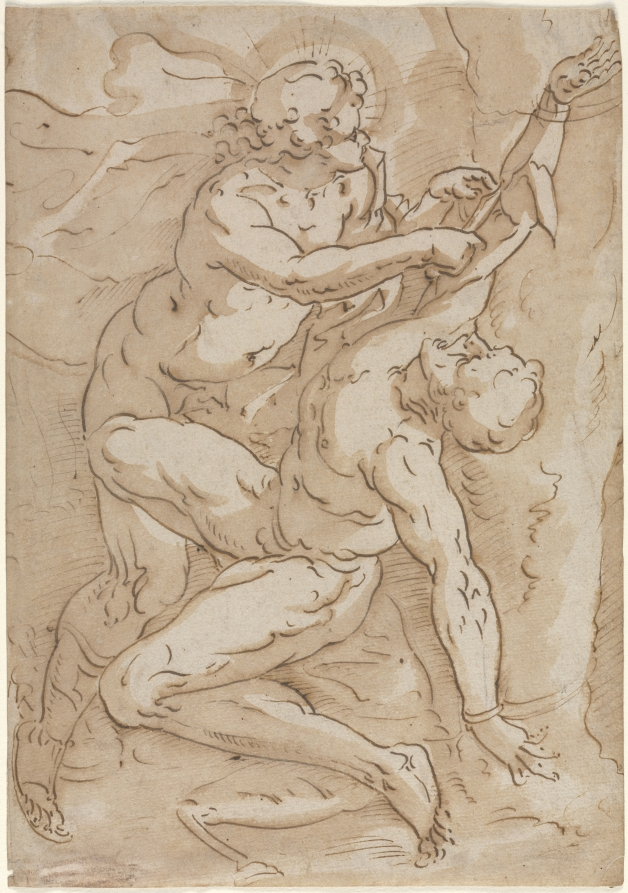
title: Apollo Flaying Marsyas (recto)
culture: Germany (or Netherlands), 16th century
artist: Anonymous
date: 1500s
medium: pen and brown ink and brown wash over black chalk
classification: Drawing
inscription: VERSO, upper center, in brown ink: Apollo chi scortica Marzia ; center, in graphite: 19